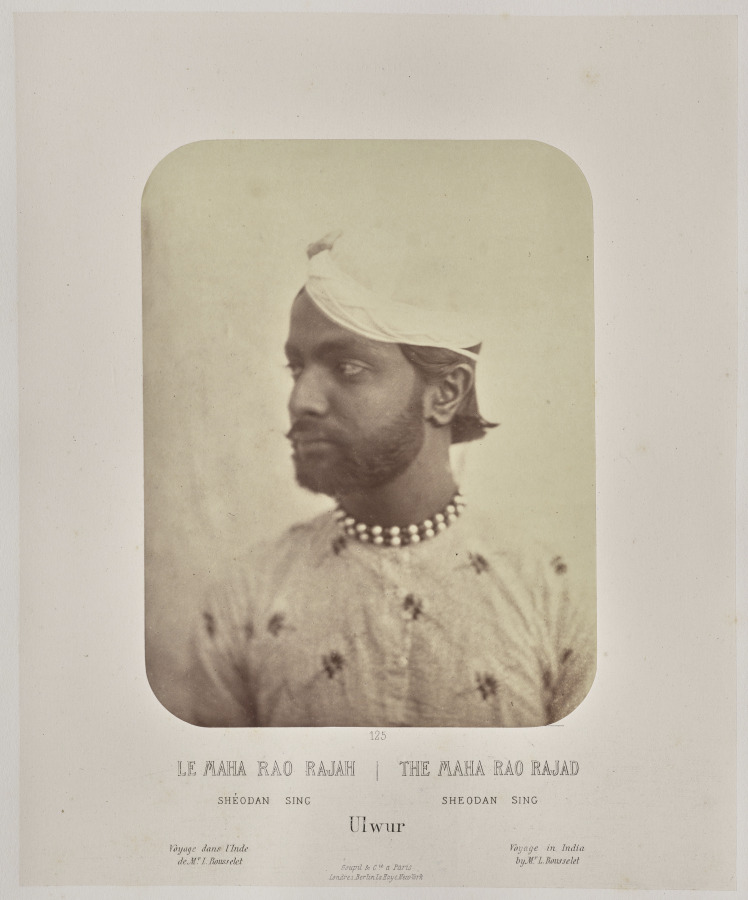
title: The Maha Rao Rajad, Sheodan Sing, Ulwur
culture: France, 19th century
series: India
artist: Louis-Théophile Marie Rousselet (French, 1845–1929)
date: 1865–68, published 1869–70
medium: Albumen print from glass plate negative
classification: Photograph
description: Concerned that his drawings did not do justice to the splendor of India’s monuments, Rousselet learned photography in India that year, a remarkable accomplishment. He proved to be a talented photographer with a sophisticated sense of composition. The scenes in this volume sweep across sites of Sultanate, Rajput, and Mughal power in northern India, from the sacred Hindu city of Varanasi on the Ganges River to Alwar in Rajasthan. Also included are several scenes of industry and portraits of Indian rulers.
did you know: Louis Rousselet described himself as a “scientific traveler” when he went to India alone at age 18 in 1863 and stayed into 1868.